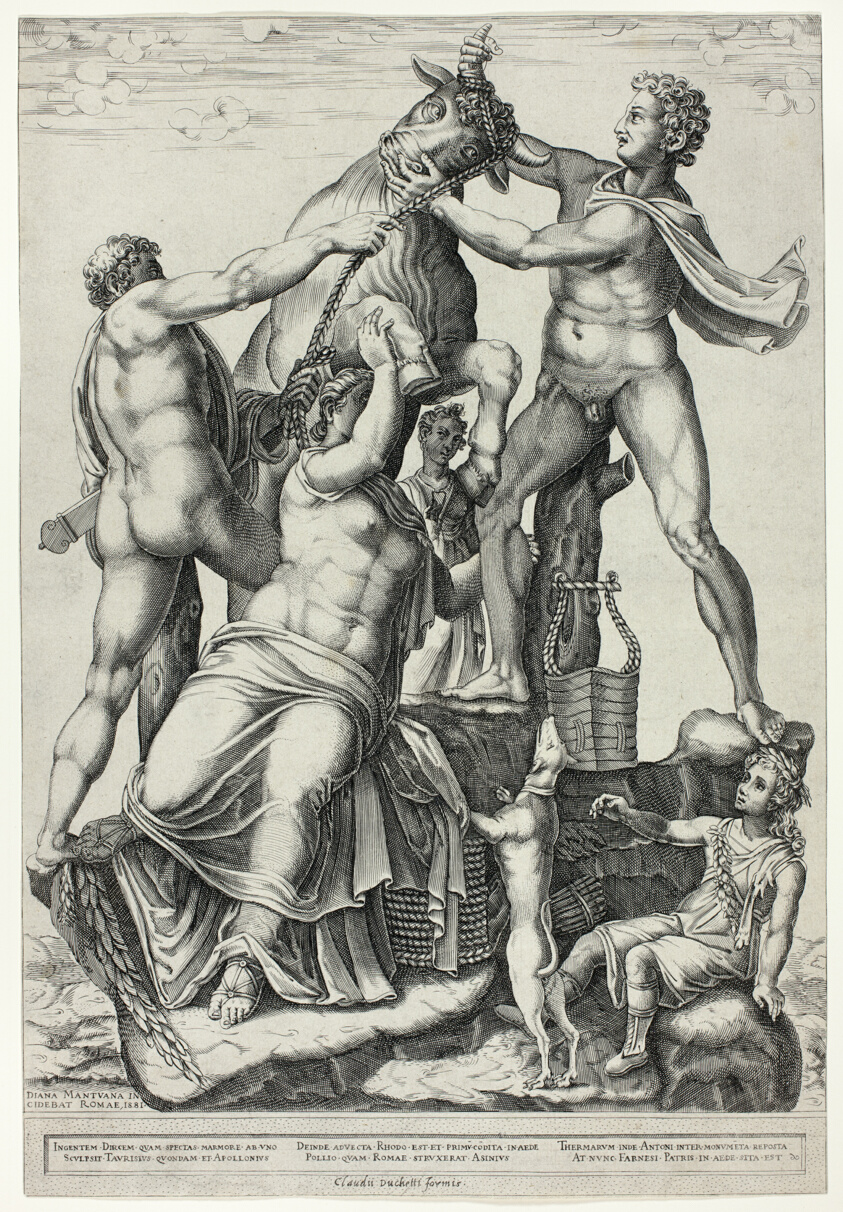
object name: Print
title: The Farnese Bull with Dirce, Zethus and Amphion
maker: Diana Scultori (Italian, c. 1547–1612)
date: 1581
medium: Engraving in black on ivory laid paper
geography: Italy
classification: engraving; paper; print; prints and drawing